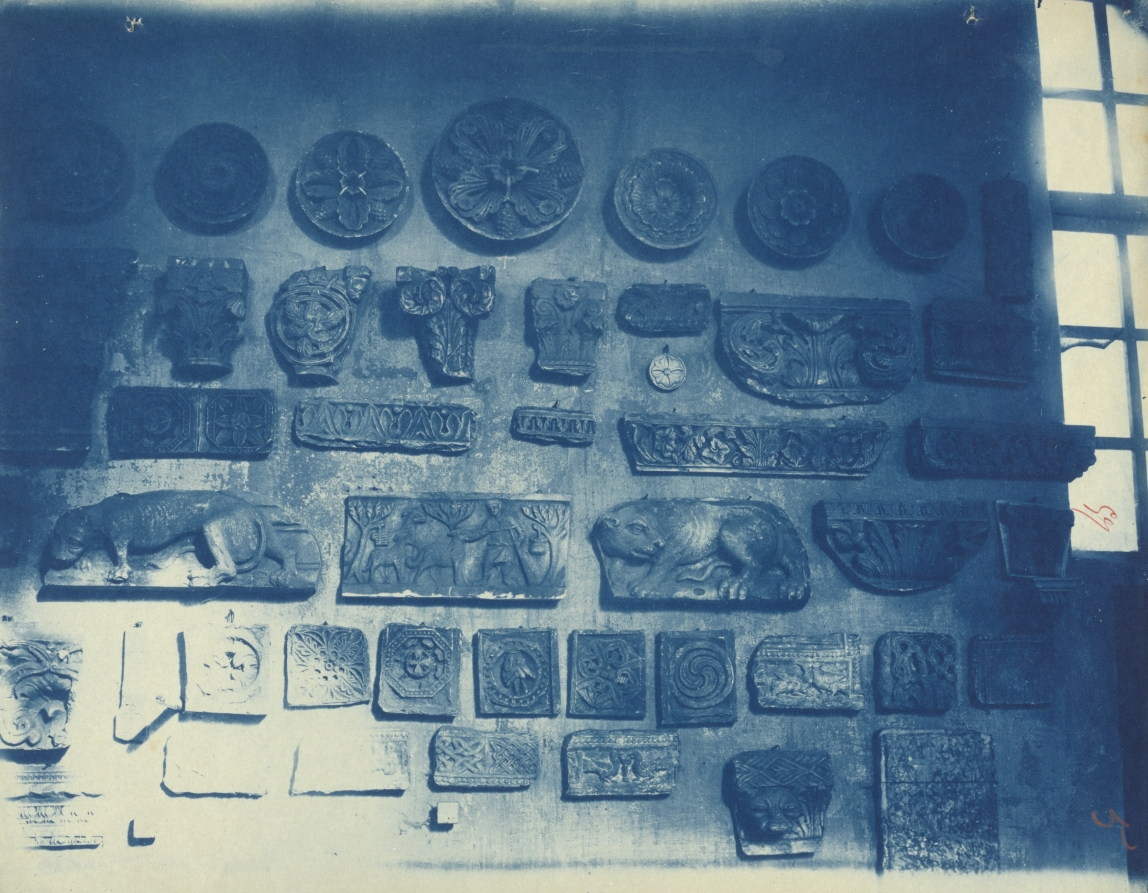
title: Casts of Architectural Details in a Studio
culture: France, 19th century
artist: Adolphe Terris (French, 1820–1900)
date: c. 1868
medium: cyanotype print from wet collodion negative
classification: Photograph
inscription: written in pencil on verso: "M2219"; written in red ink on recto: "51"(?); written in red crayon: "5"(?)